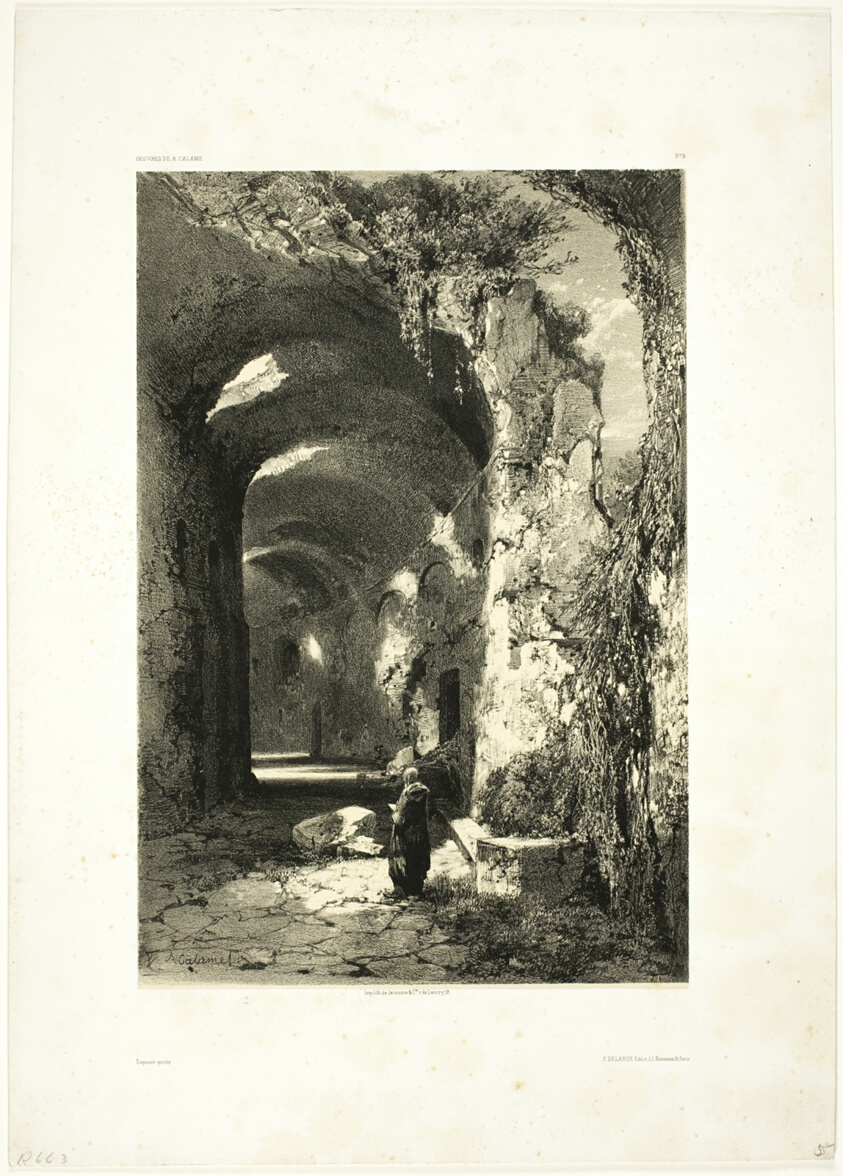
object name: Print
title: Ruin of an Amphitheatre at Pouzzoles (Kingdom of Naples), plate 9 from Oeuvres de A. Calame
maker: Alexandre Calame (Swiss, 1810-1864); published by F. Delarue (French, 1805-1886); printed by Jacomme et Compagnie (French, 19th century)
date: 1851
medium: Lithograph on buff chine collé, laid down on off-white wove paper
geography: Switzerland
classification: lithograph; print; prints and drawing